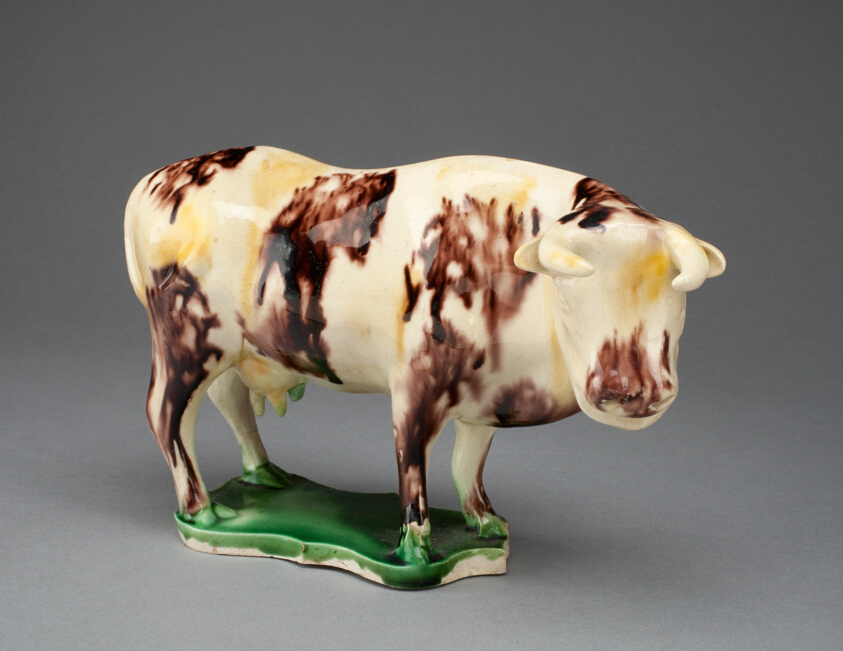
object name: Ceramics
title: Cow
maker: Staffordshire, England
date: c. 1765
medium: Lead-glazed earthenware (creamware)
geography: Staffordshire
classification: earthenware; creamware; european decorative arts; lead-glazed earthenware; ceramics